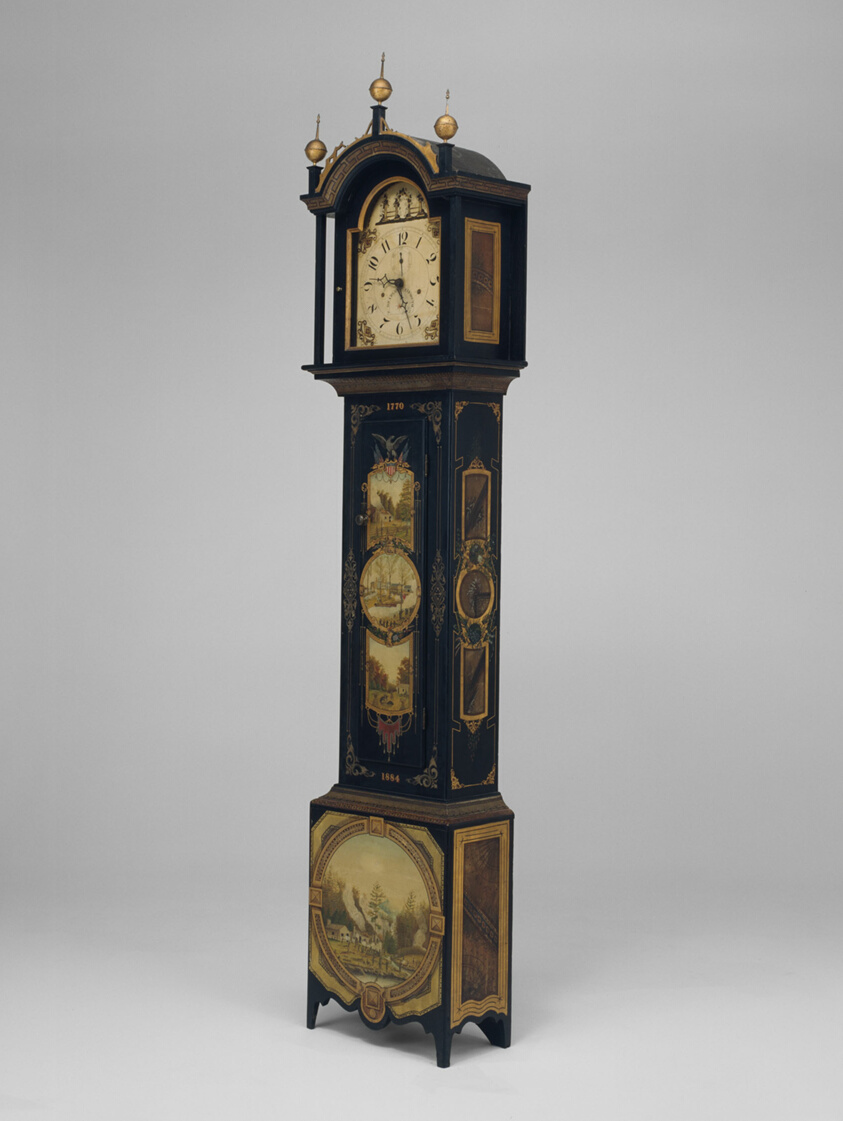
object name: Decorative Arts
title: Tall Case Clock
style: Folk Art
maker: Painted by Uriah Dyer; American, 1849–1927; Works by Silas Hoadley (clockmaker); American, 1786–1870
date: 1820–84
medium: Painted pine, gilded copper alloy, iron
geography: Maine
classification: case furniture; furniture; american decorative arts; american arts; decorative arts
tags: furniture